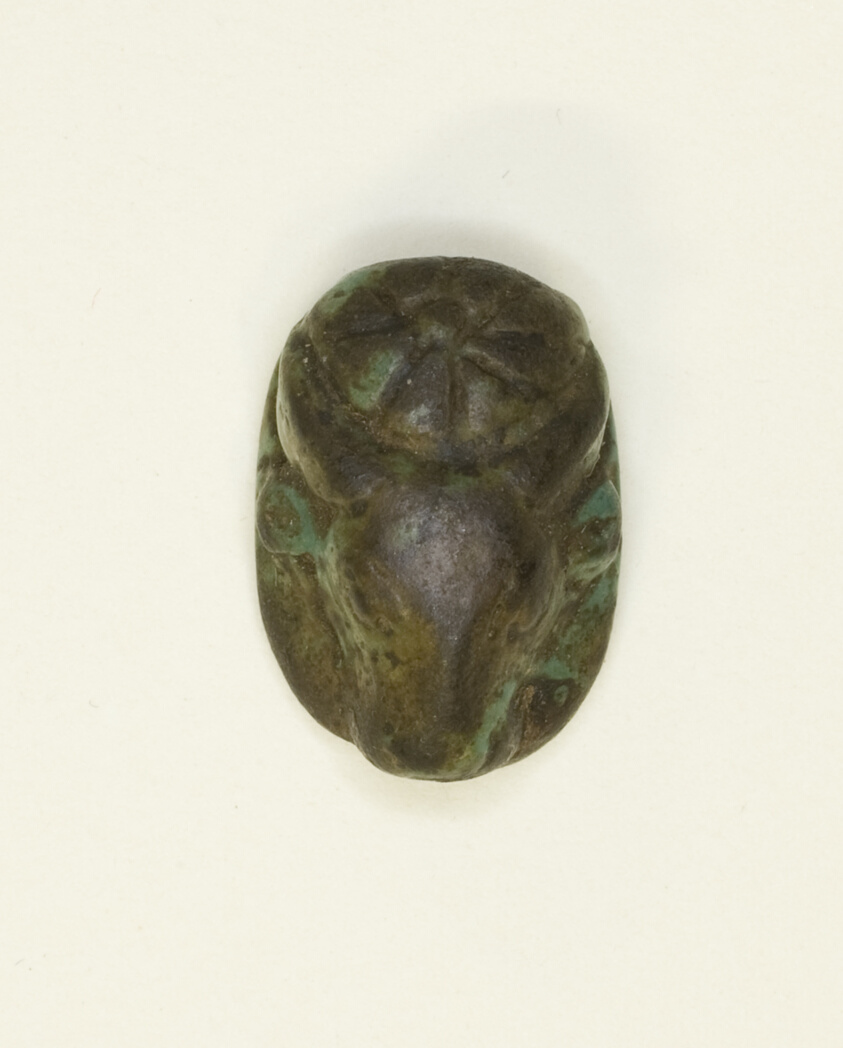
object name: Costume and Accessories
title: Scaraboid: Cow Head with Rosette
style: new kingdom, ancient, egyptian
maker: Egyptian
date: New Kingdom, Dynasties 18–20 (about 1550–1069 BCE)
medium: Faience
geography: Egypt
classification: scaraboids; ancient art; costume; faïence (composite material)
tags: cows